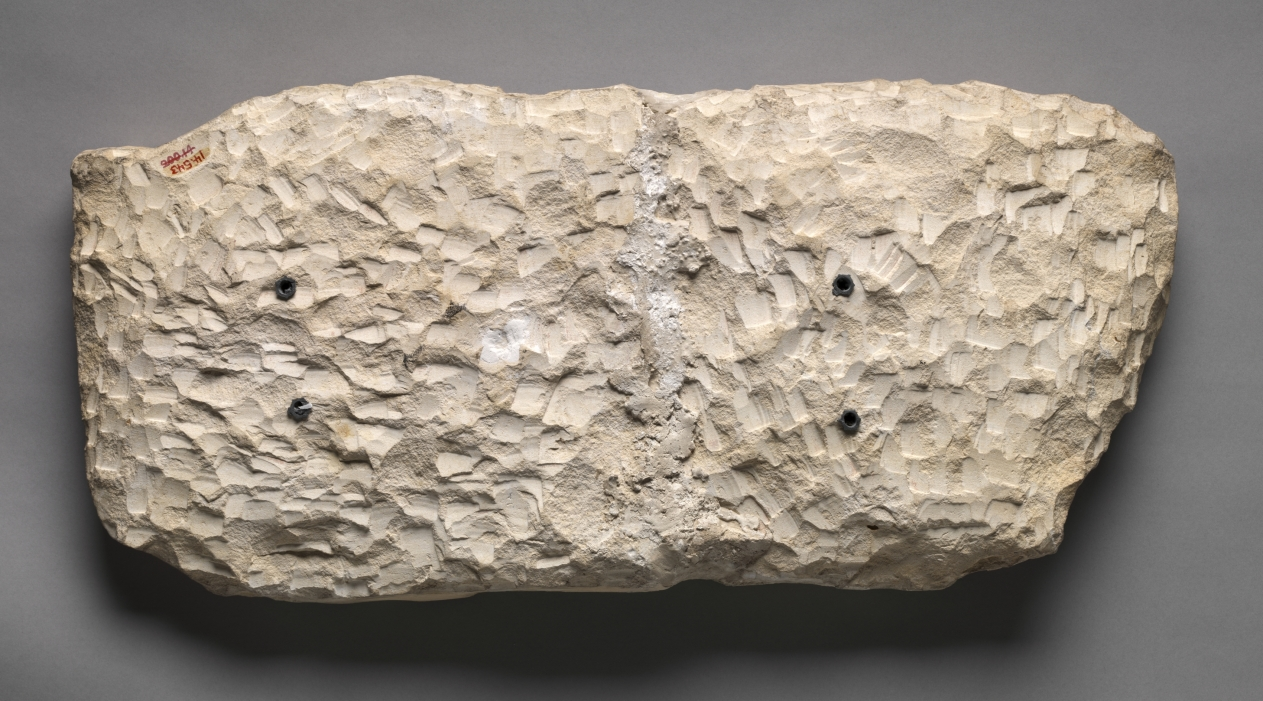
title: Stele of Itetioqer and Family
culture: Egypt, Southern Upper Egypt, Middle Kingdom (2040–1648 BCE), Dynasty 11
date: c. 2123–2040 BCE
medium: painted limestone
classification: Sculpture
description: The huge eyes, spindly limbs, and awkwardly laid out inscriptions are typical of the period after the collapse of the Old Kingdom, when there was no central government. Court sponsorship of the arts declined drastically during this time, and art in the provinces followed its own course. A certain folksy charm--naive and utterly unpretentious--compensates for the lack of sophistication. The two women standing behind the seated man and his wife are probably their daughters. The man’s skin is painted red, the women’s yellow, as was the tradition in Egypt. The inscription is a standard formula for funerary offerings on behalf of Itetioqer.